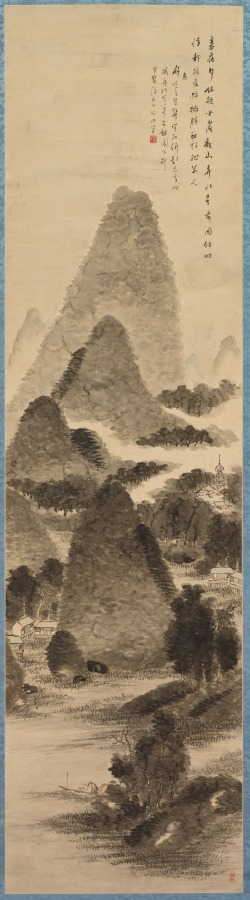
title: Mountain View and Blue Water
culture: Japan, Edo period (1615–1868)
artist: Tanomura Chikuden (Japanese, 1777–1835)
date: early 1800s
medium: hanging scroll; ink, color, and gold on paper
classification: Painting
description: Tanomura Chikuden was an eminent painter whose adopted son, Tanomura Chokunyū (1814–1907), was Seifū Yohei III’s painting teacher. This work was displayed at a gathering commemorating the 10th anniversary of Chokunyū’s death, something we know only because its custom-made box and archival documents have been carefully kept together. The box inscription also confirms that Chikuden was emulating the style of the Mi family of painters, active during China’s Southern Song dynasty (1127–1279). The painting’s Chinese-style silk wrapper is inscribed and sealed on its interior by members of Chokunyū’s community.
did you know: The mountain shapes are built up with multiple small wet strokes.